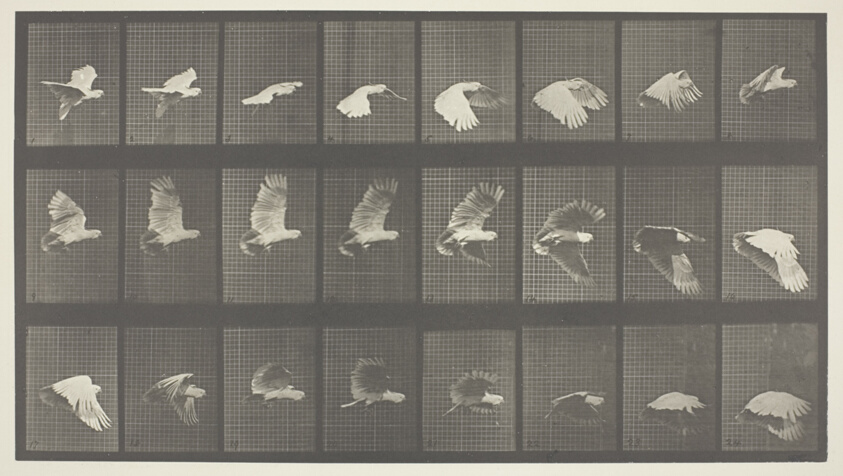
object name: Photograph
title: Animal Locomotion, Plate 758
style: 19th century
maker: Eadweard Muybridge (English, active United States, 1830–1904)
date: 1887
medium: Collotype, from "Animal Locomotion"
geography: England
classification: photograph; collotype; photography